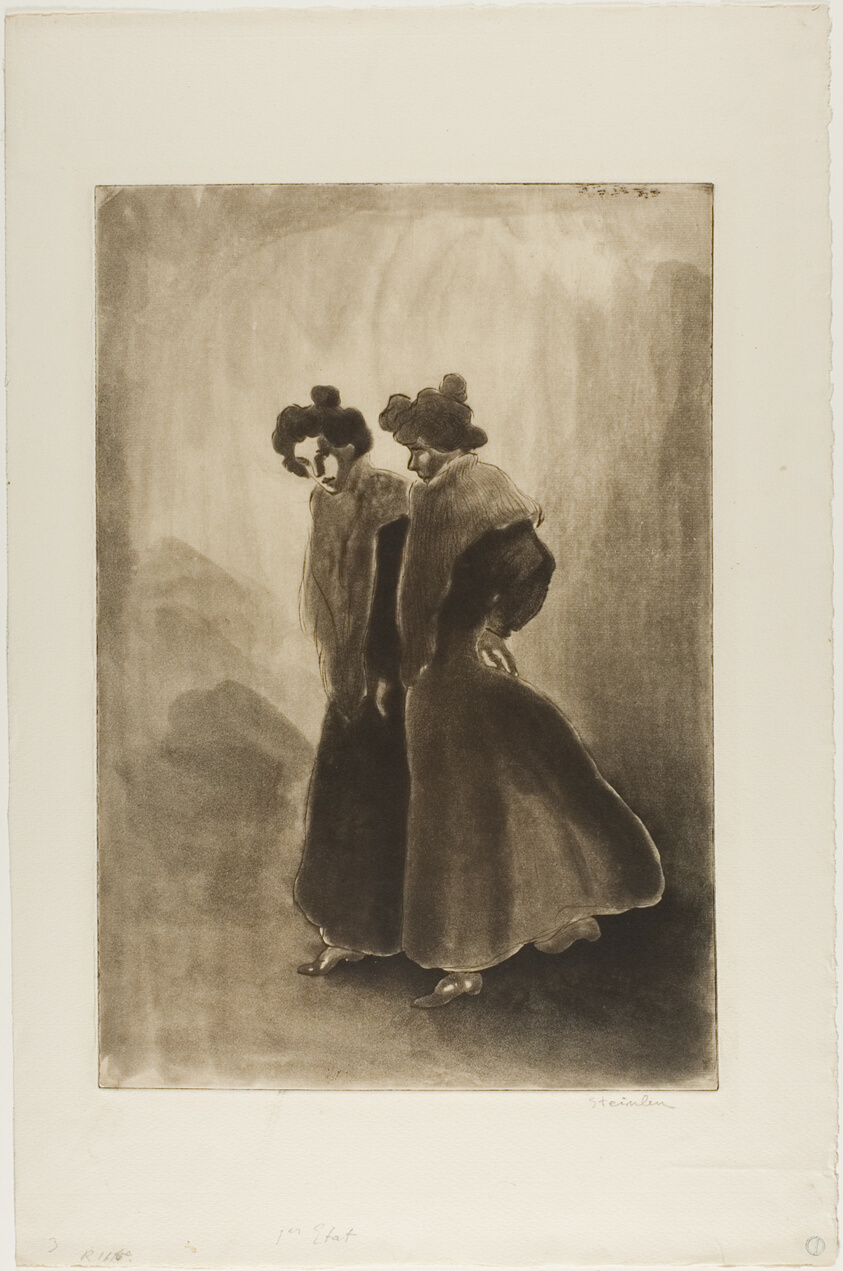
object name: Print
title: Two Women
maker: Théophile-Alexandre Steinlen; French, born Switzerland, 1859-1923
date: 1902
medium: Aquatint and drypoint from a zinc plate on ivory laid paper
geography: France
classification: aquatint; print; prints and drawing